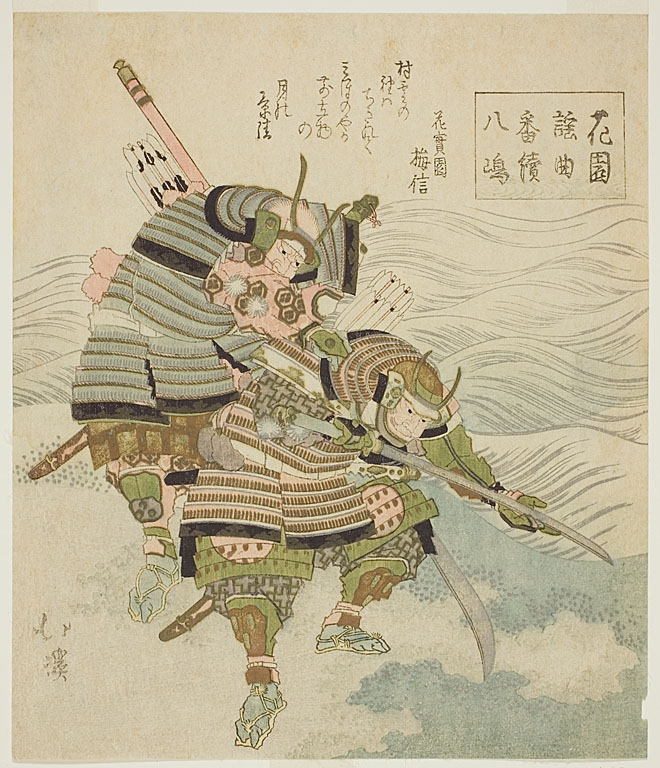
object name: Print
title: Yashima, a Warrior Play, from the series "Noh Songs of Gardens (Hanazono yokyoku bantsuzuki)"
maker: Totoya Hokkei (Japanese, 1780–1850)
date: about 1826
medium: Color woodblock print; surimono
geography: Japan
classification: woodblock print; print; asian art